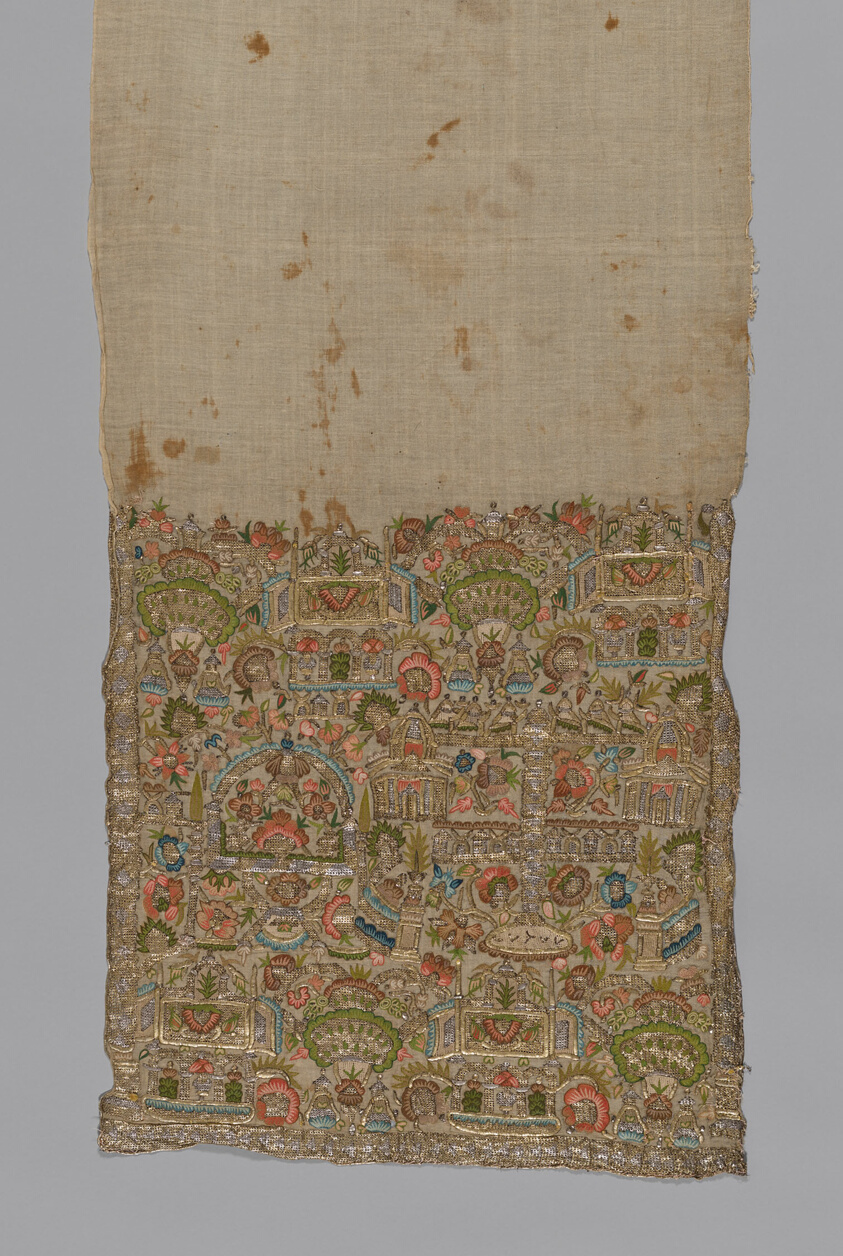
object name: Costume and Accessories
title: Sash (?)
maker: Turkey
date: 1850/1900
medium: Towel, embroidered in trees and flower design.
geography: Turkey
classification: textile; needlework (visual works); weaving; costume